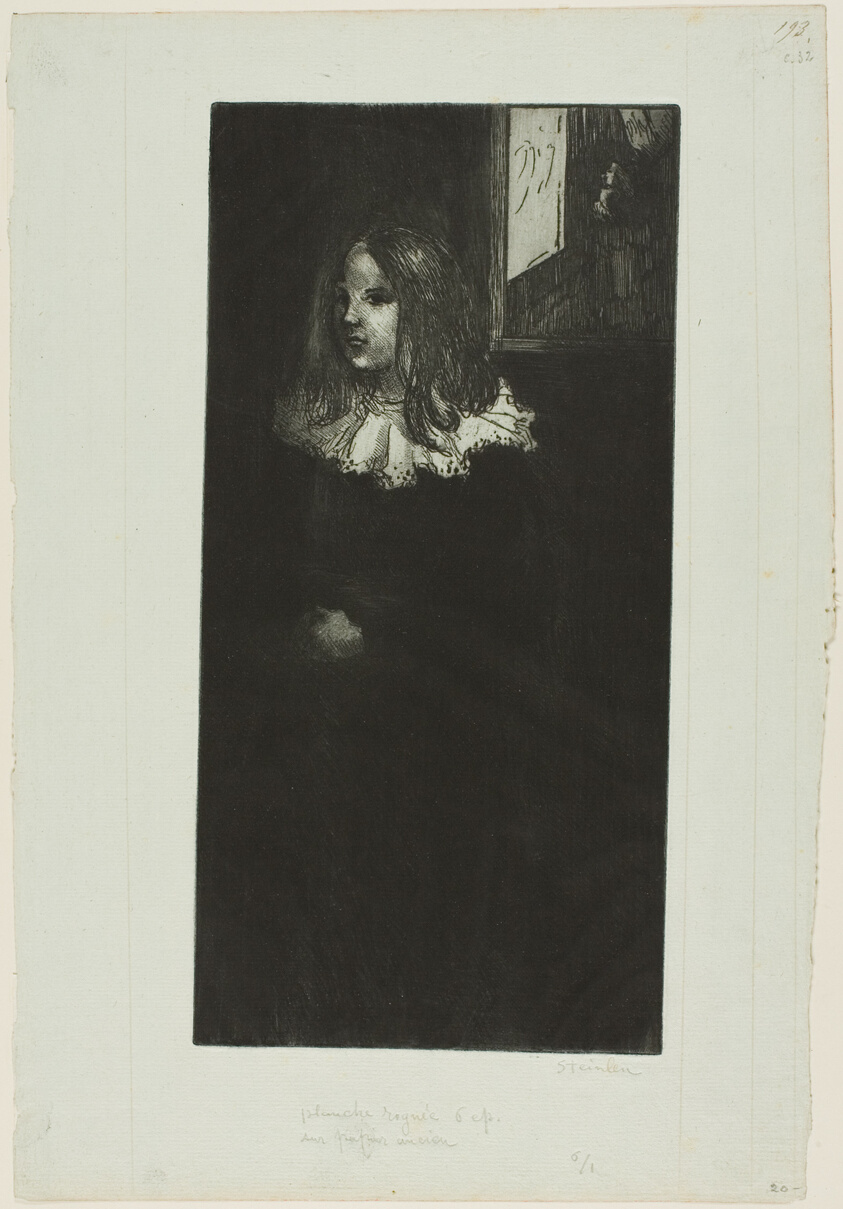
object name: Print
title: Young Girl with a White Collar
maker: Théophile-Alexandre Steinlen; French, born Switzerland, 1859-1923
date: 1898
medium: Etching and drypoint from a zinc plate in black on blue-green laid paper (accounting paper from a book)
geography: France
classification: etching; print; prints and drawing